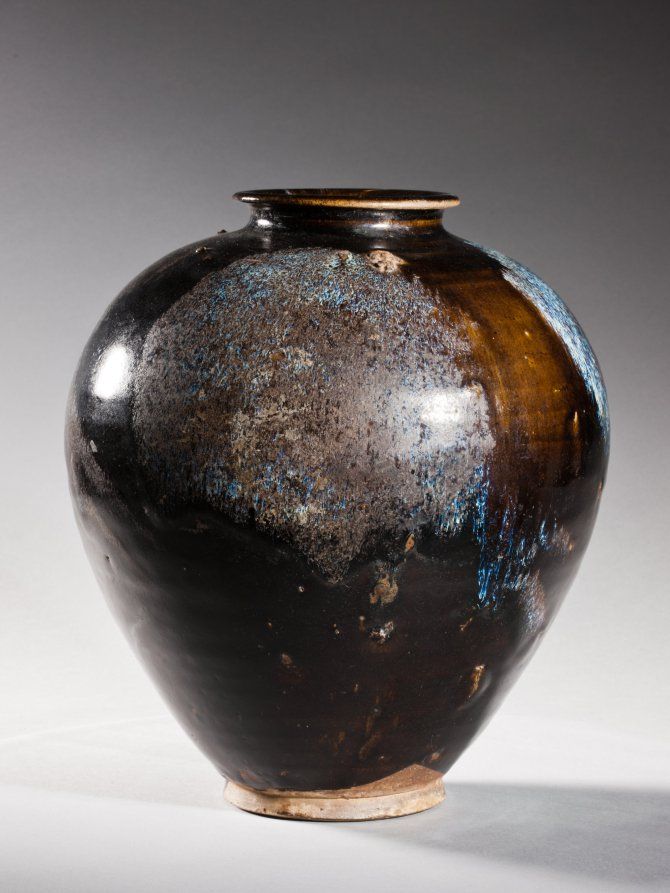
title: Jar: Black Ware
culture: China, Henan province, Huangdao kilns, Tang dynasty (618-907)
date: 700s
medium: glazed stoneware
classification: Ceramic